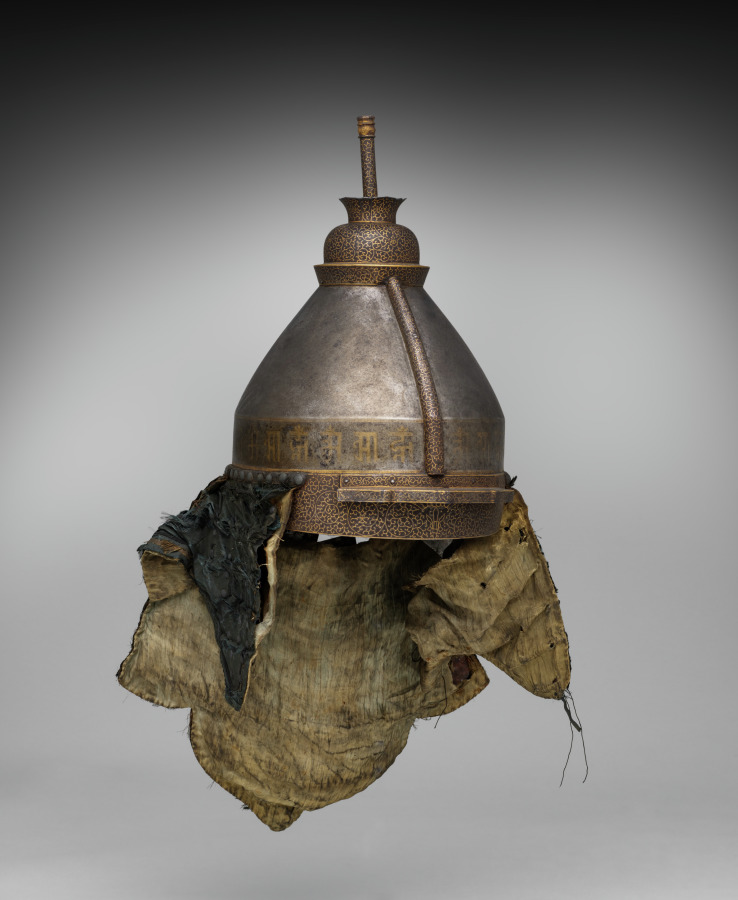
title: Helmet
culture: Sino-Tibetan, Ming dynasty (1368-1644)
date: 1368–1644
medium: iron inlaid with gold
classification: Arms and Armor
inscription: Tibetan inscription